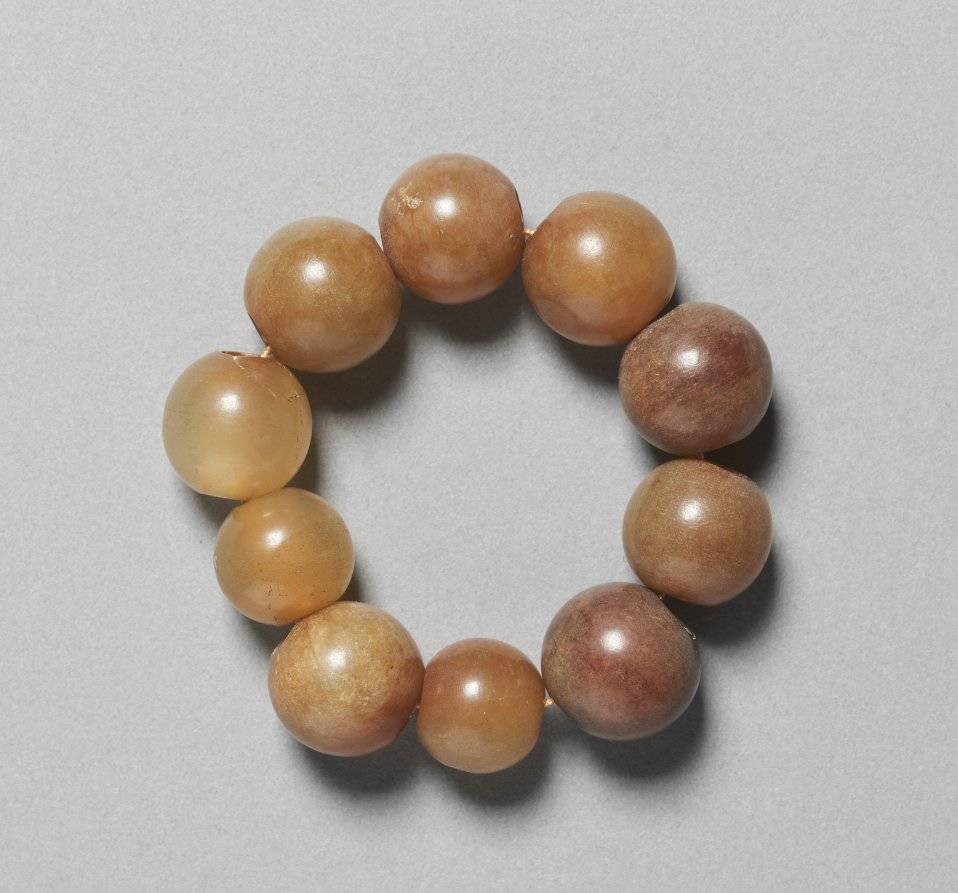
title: String of Glass Beads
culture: Korea, Joseon dynasty (1392–1910)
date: 1392–1910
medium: glass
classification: Jewelry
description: An enormous amount of beaded strings and necklaces were excavated from Silla tomb sites. Glass, largely produced first in ancient Rome and then in Egypt and many central Asian states, reached the Korean peninsula through the Silk Road, the ancient global trade route. The glass beads used for this string must have been considered imported luxury materials.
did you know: Accessories such as a string of glass beads were among various burial items in the Joseon period (1392–1910).